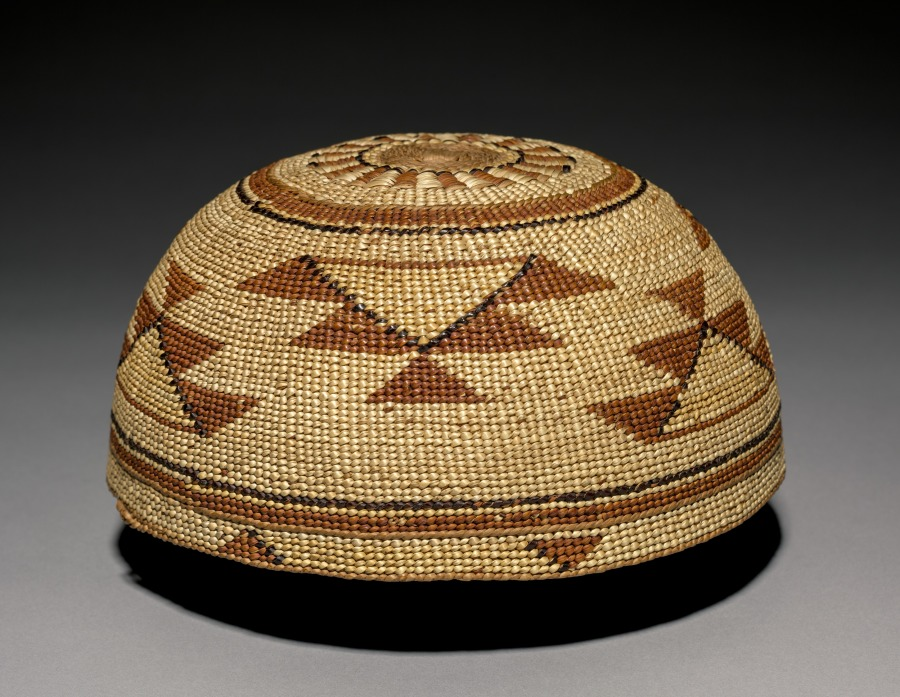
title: Hat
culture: California, late 19th- early 20th century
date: c 1875–1917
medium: plain-twined hazel with decoration in beargrass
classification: Basketry